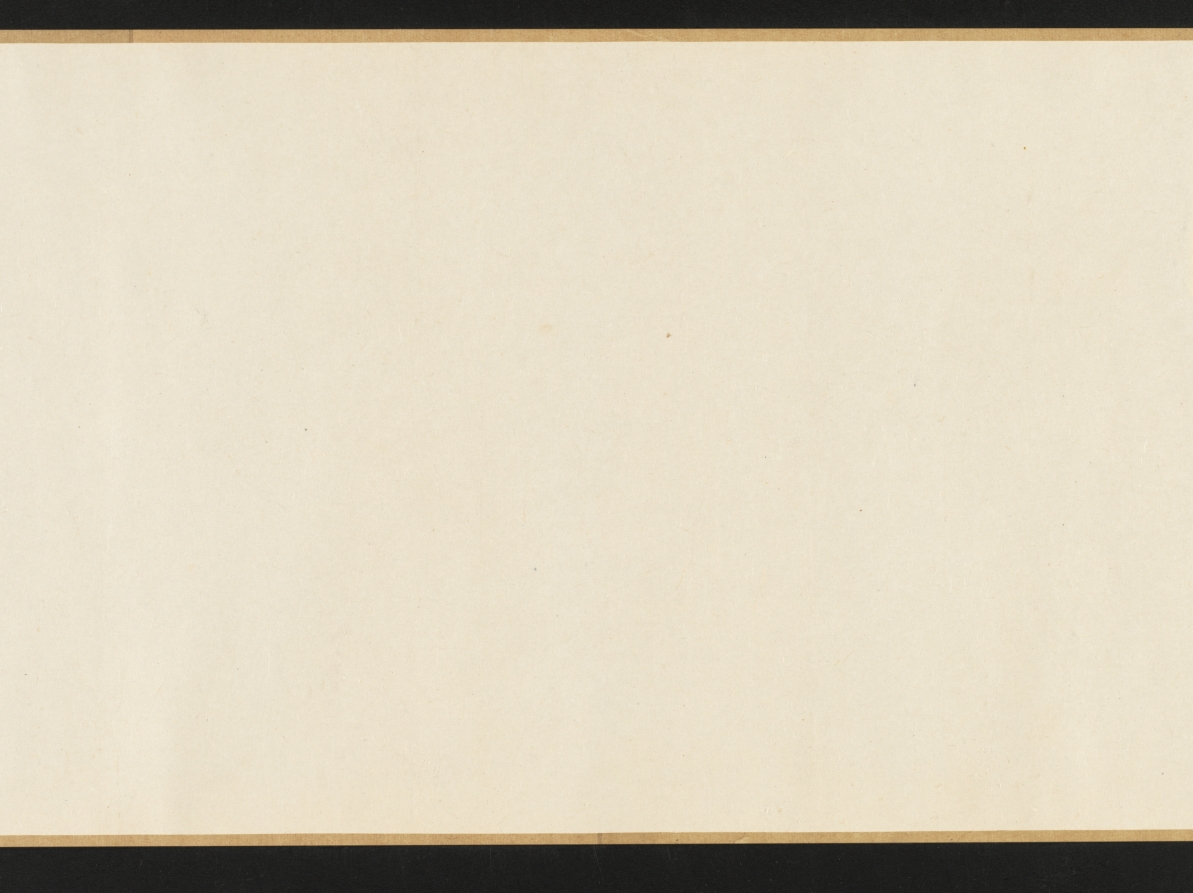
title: The Lantern Night Excursion of Zhong Kui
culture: China, Yuan dynasty (1271-1368)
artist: Yan Hui (Chinese, active 1270–1310)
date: late 1200s–early 1300s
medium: handscroll; ink and slight color on silk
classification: Painting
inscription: Artist's signature [and probable seal]: Yan Qiuyue 顏秋月 Title on frontispiece and 1 seal of Niu Shuyu 鈕樹玉 (1760–1827): Qiuyue mohuan 秋月墨幻 [Qiuyue's Ink Fantasy]. 31 additional seals: 2 of Yang Shiqi 楊士奇 (1365–1444); 2 of An Guo 安國 (1481–1534); 8 of Xiang Yuanbian 項元汴 (1525–1590); 2 of Geng Zhaozhong 耿昭忠 (1640–1686); 4 of Pu Tung 溥侗 (1870–1952); 7 of Tan Jing 譚敬 (1911–1991); 1 of Liu Ting-chih (20th c.); 5 unidentified.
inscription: An inscription by Zizhi Shanren 紫芝山人 [probably Jiang Hui 蔣惠], dated 1389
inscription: An inscription by Wu Kuan 吳寬 (1436–1504)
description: Here, the demon queller Zhong Kui leads a nightly procession of street entertainers with bare, muscular bodies and demonic faces. Some wear shabby clothes, and all perform stunts and tricks to astound and scare the viewer. In fact, a New Year custom in cities of southeast China had the poor, disguised as demons, process through the streets and play their tricks to clear households of evil spirits and welcome the spring. From right to left, a demonic figure leads the procession and beats a drum; another lifts a large rock; one stands on his hands trying to drink; one balances a jar on his elbow; three hold and wield weapons; one carries a folded chair covered by a cow’s skin; another holds Zhong Kui’s qin (zither), books, brush, and inkstone. At the end of the scroll, two figures offer a cup and bottle of wine to Zhong Kui, who lifts his hand in command.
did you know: Zhong Kui was an ancient ghostbuster.